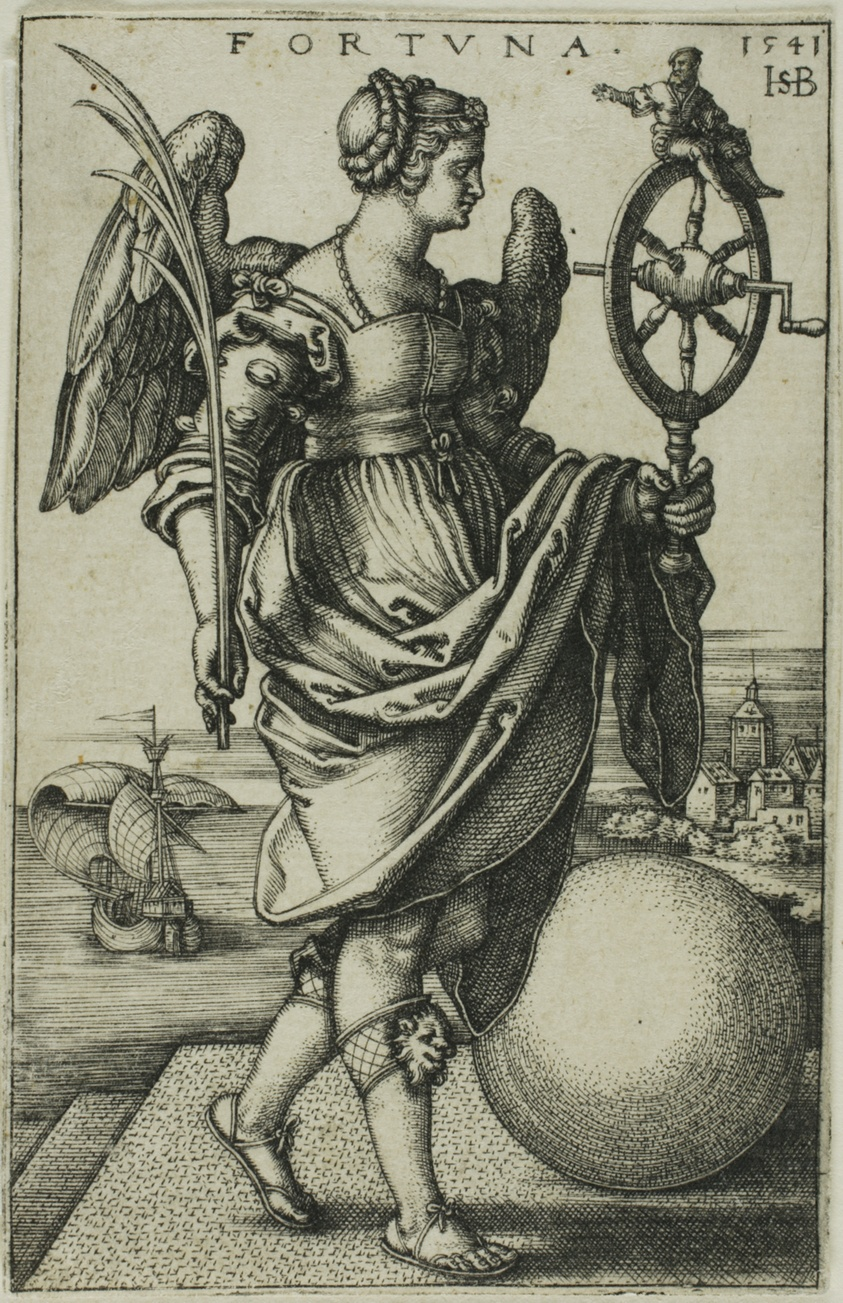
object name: Print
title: Fortune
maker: Sebald Beham; German, 1500-1550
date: 1541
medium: Engraving in black on ivory laid paper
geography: Germany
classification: engraving; print; prints and drawing